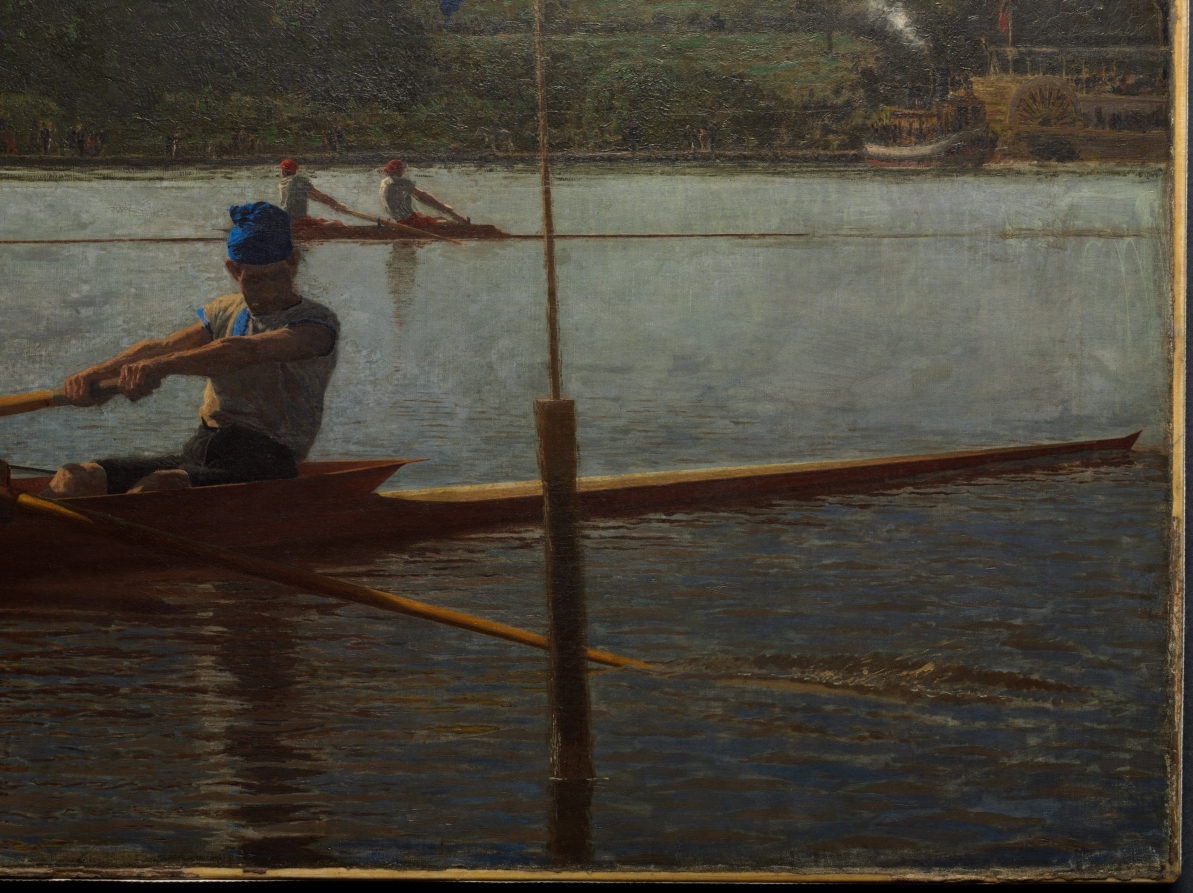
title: The Biglin Brothers Turning the Stake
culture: America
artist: Thomas Eakins (American, 1844–1916)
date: 1873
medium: oil on canvas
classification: Painting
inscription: signed lower left: EAKINS 73.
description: Eakins's painting celebrates athletic teamwork while commemorating an actual event, a famous rowing race that took place on the Schuylkill River in Philadelphia during May 1872. Throngs of spectators line the riverbank and watch as Barney and John Biglin negotiate the tricky turn around a stake marking the halfway point in the contest. Their competitors, seen in the middle distance at the right, lag behind. The Biglin brothers won the race, cementing their status as the most celebrated oarsmen of the era. Trained in the United States and France, Eakins spent almost his entire artistic career in his hometown of Philadelphia. He is renowned for the unsentimental realism in his paintings, whose compositions he developed through painstakingly prepared figure and perspective drawings.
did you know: Rowing was among the most popular spectator sports in the U.S. during the 1870s.